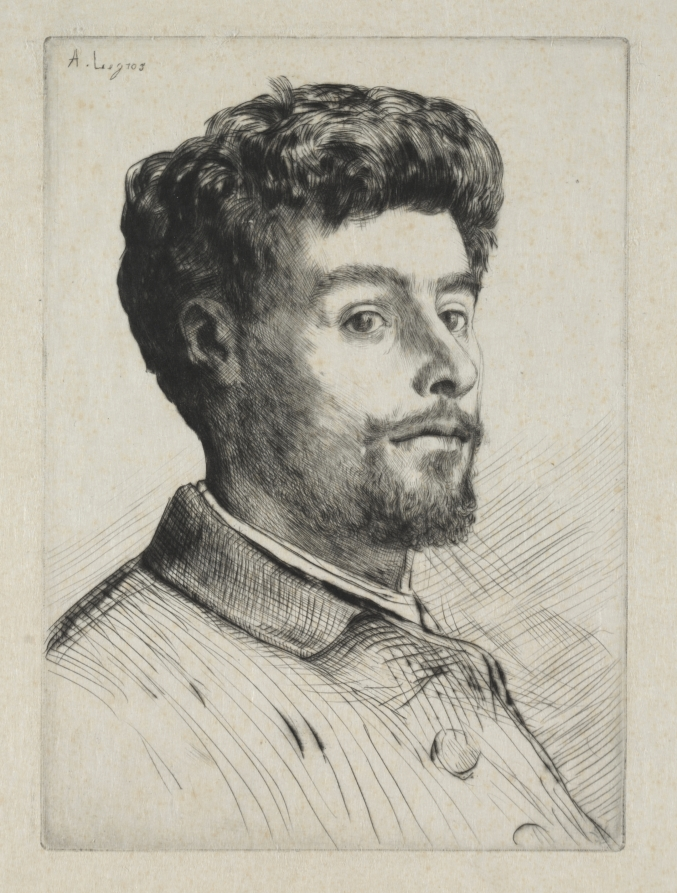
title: Frédéric Régamey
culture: France, 19th century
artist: Alphonse Legros (French, 1837–1911)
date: c. 1857–1911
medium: drypoint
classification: Print